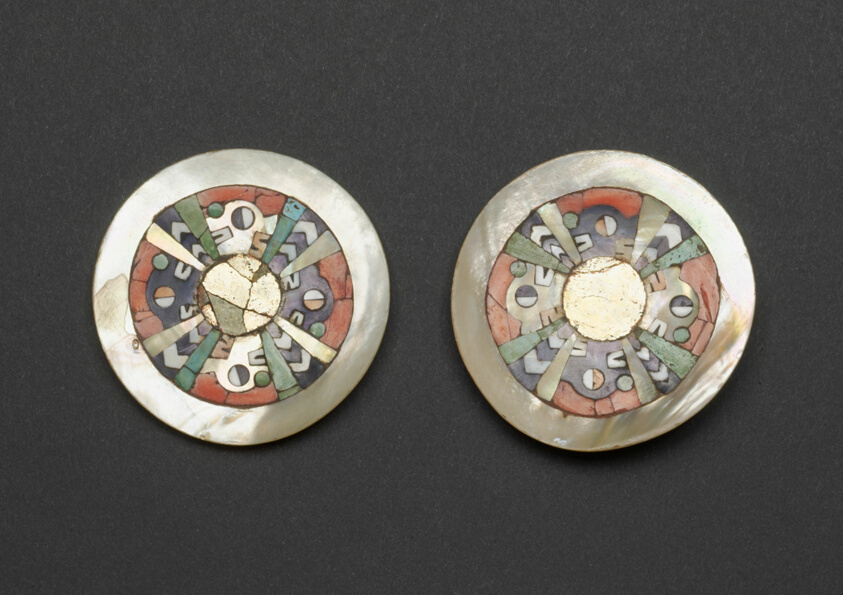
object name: Costume and Accessories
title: Ear Ornaments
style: tiahuanaco, huari, americas, andes, Arts of the Americas, andean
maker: Tiwanaku-Wari; Coastal Peru or highland Bolivia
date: 400–800 CE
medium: Shell, stone, silver, and copper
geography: Peru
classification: shell; jewelry; costume; art of the americas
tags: abstract figures, geometric